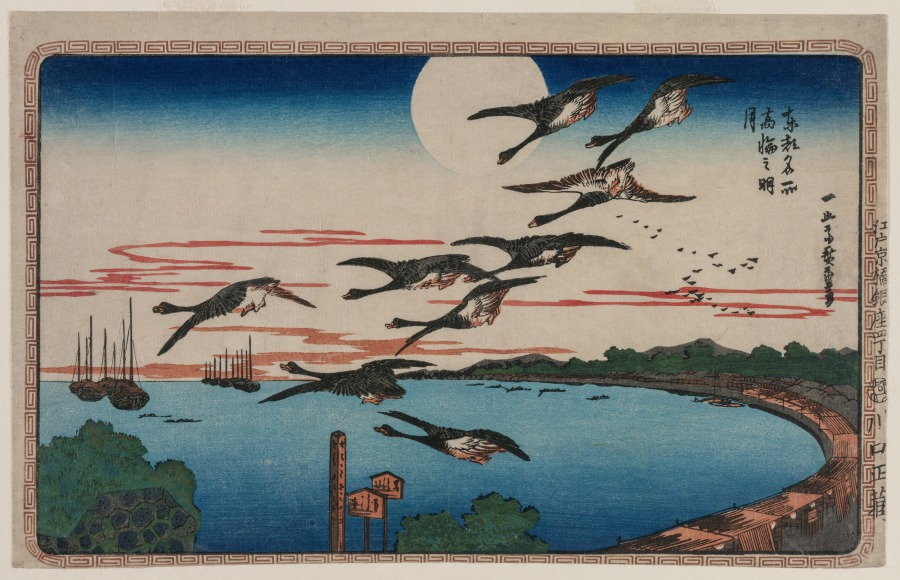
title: Full Moon over Takanawa, from the series Famous Places in the Eastern Capital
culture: Japan, Edo period (1615–1868)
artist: Utagawa Hiroshige (Japanese, 1797–1858)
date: c. 1831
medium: color woodblock print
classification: Print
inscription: Signature: Ichiysai Hiroshige ga Publisher: Kawaguchi Shozo, Edo Kyobashi Ginza 4-chome Censorship Seal: kiwame